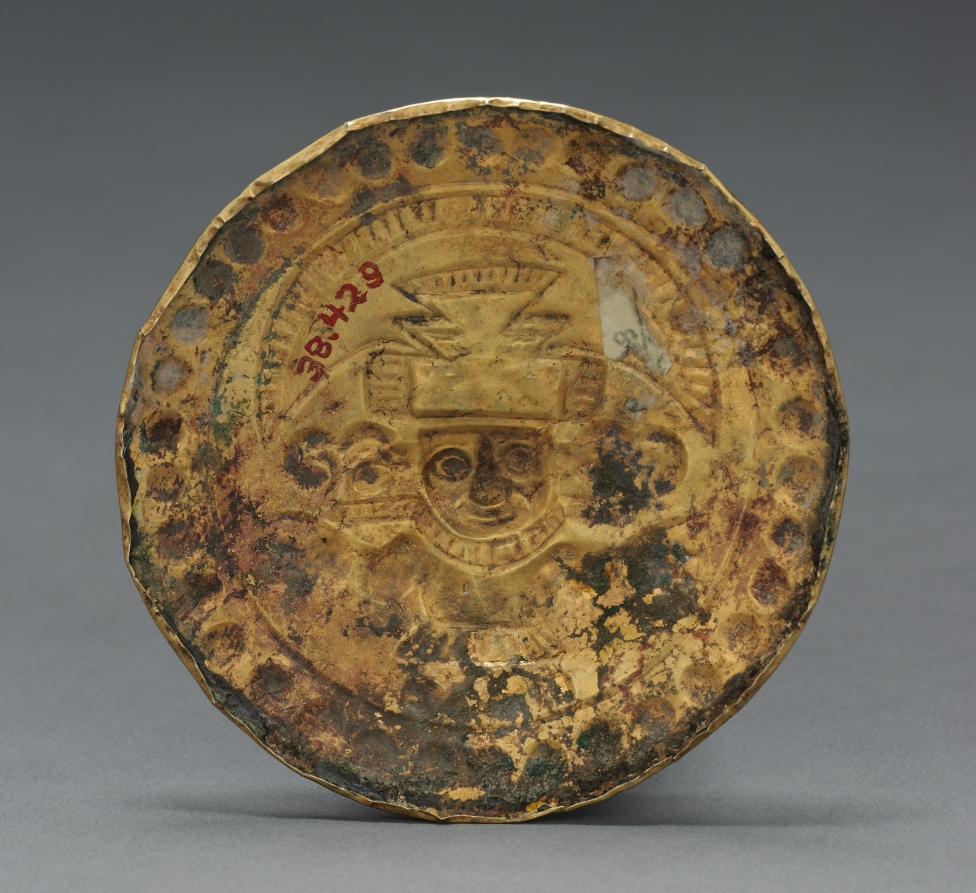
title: Ear Flare Frontal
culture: Peru, North Coast, Paramonga(?), Chimú style (900-1470)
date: Chimú style (900–1470)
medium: hammered gold alloy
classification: Jewelry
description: These discs originally were fastened to the fronts of ear flares like those shown nearby.